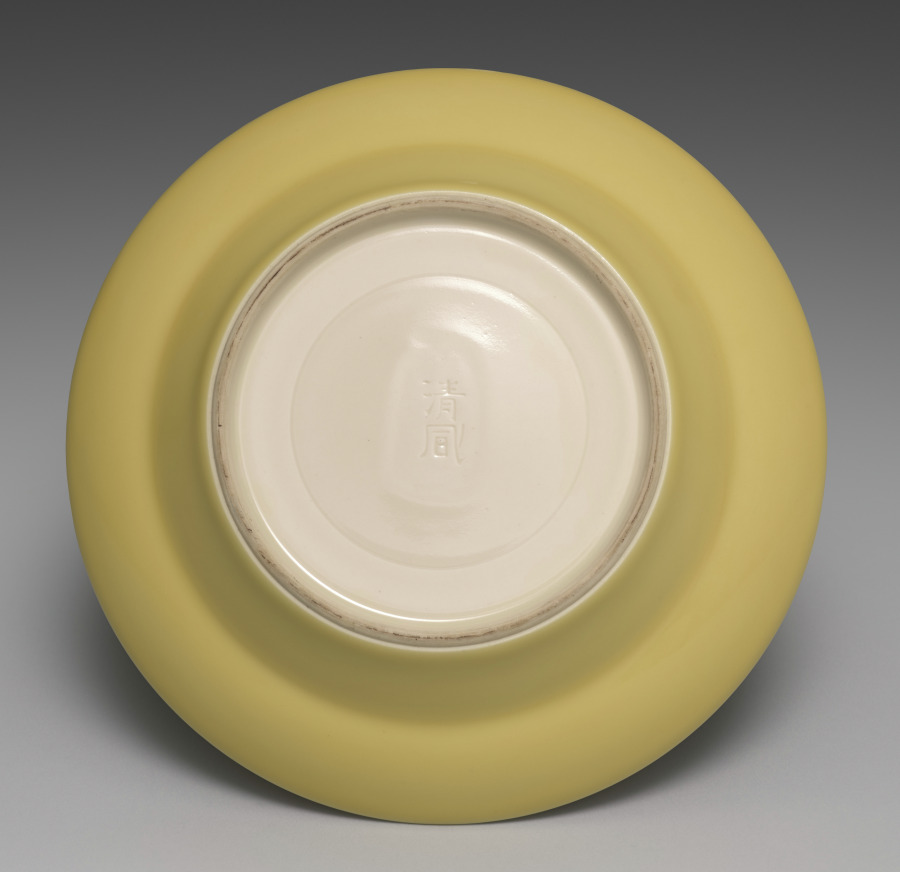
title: Sweets Bowl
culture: Japan, Meiji period (1868–1912)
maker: Seifū Yohei III (Japanese, 1851–1914)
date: 1893–1914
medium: Glazed porcelain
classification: Ceramic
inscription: 清風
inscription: 金聲玉振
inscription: 帝室技芸員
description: Seifū Yohei III was the most prominent head of a ceramics studio in Kyoto that specialized in Chinese-style porcelains and especially items for use in sencha (煎茶), or the drinking of steeped-leaf tea with companions. Sencha was popular among the bunjin of Kyoto and Osaka, who often enjoyed it as part of their emulation of Chinese culture. While sencha was by design less formal than the Japanese tea ceremony, it still featured the display of treasured objects. Prized Chinese antiquities were generally unobtainable, so substitutes such as the Gu-Shaped Flower Vase, CMA 2022.224, were much in demand. Bowls for distributing sweets, like this one, were also a staple of sencha gatherings.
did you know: Names for the glazes, written in ink with a brush on the lids of the custom-made storage boxes for the works, often indicate a specific glaze or ware that had inspired Seifū Yohei III.